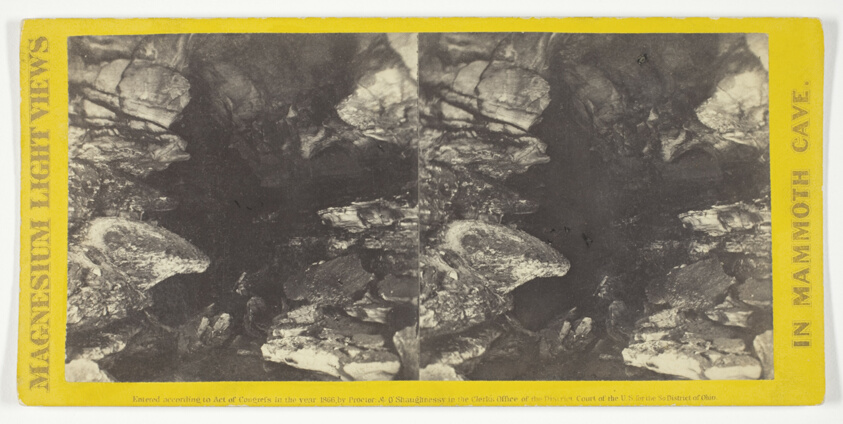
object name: Photograph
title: "Wild Hall", No. 23 from the series "Mammoth Cave Views"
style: 19th century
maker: Chas. Waldack (American, active 1860s)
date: 1866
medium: Albumen print, stereo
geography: New York City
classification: photography; photograph